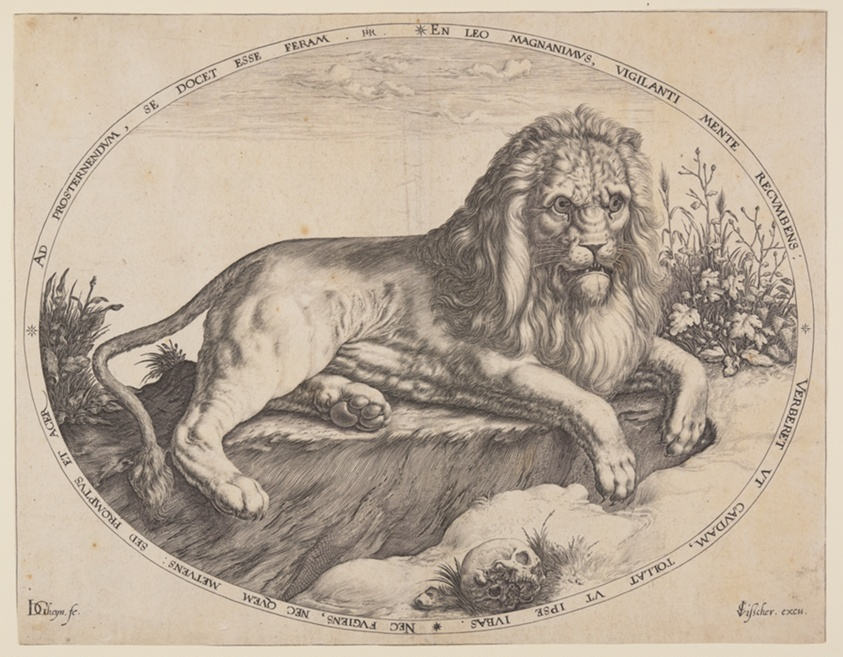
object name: Print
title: Den Grooten Leeuw (The Great Lion).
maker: Jacques de Gheyn II; Dutch, 1565–1629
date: c. 1590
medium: Engraving on ivory laid paper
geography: Netherlands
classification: print; paper; prints and drawing; engraving